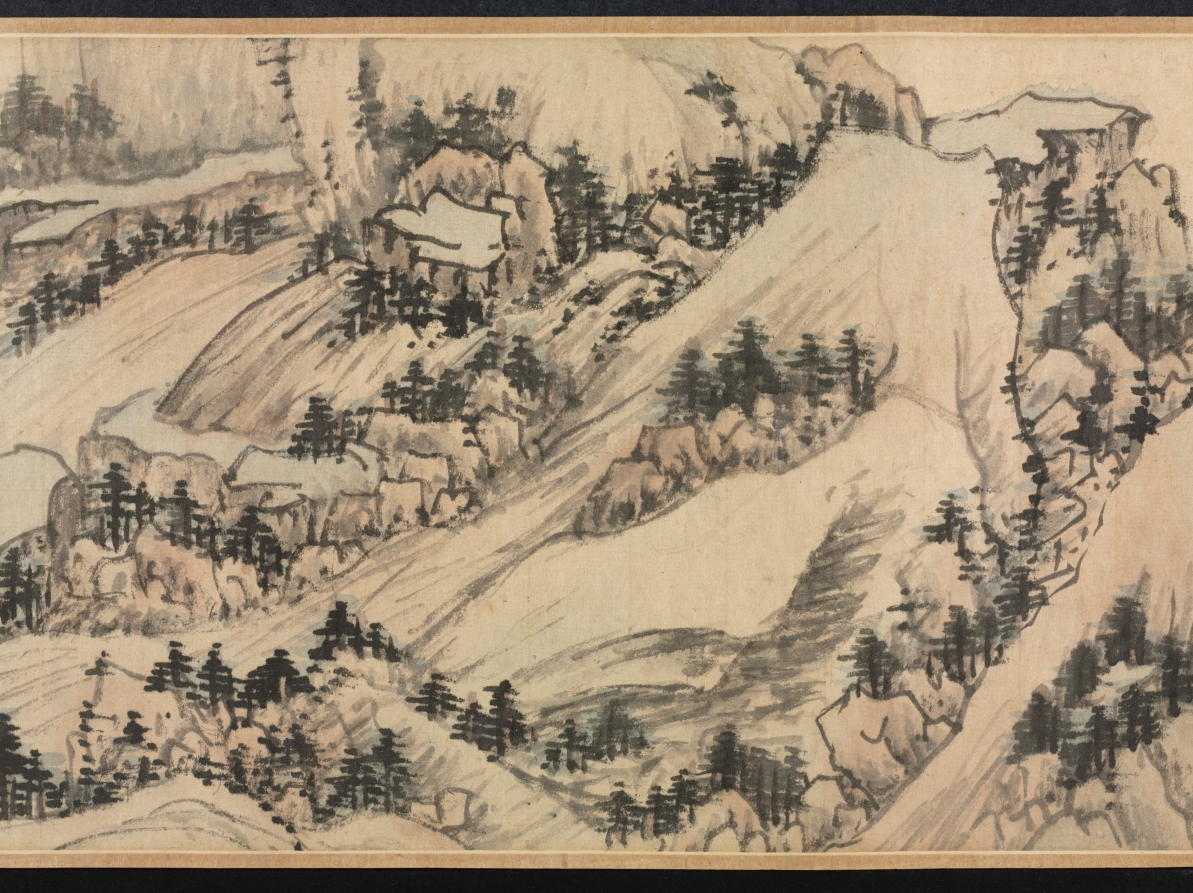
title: Dream Journey among Rivers and Mountains, no. 90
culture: China, Qing dynasty (1644-1911)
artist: Cheng Zhengkui (Chinese, 1604–1676)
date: 1658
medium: Handscroll; ink and color on paper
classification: Painting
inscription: 江山臥遊圖其九十, 青溪道人, 戊戌夏五。 [印] 程正揆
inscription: Title and inscription by Huang Yi 黃易 (1744–1802), and 3 seals.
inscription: 1 colophon and 9 additional seals: 3 seals of Dai Zhi 戴植 (active about 1821–1850); 1 colophon, dated 1914, and 3 seals of Yan Shiqing 顏世清 (1873–1929); 3 seals of Wang Nanping 王南屏 (1924–1985).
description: Cliffs and waterfalls interspersed with trees and dotted vegetation are spread over this handscroll. Long paths wind their way through villages, beside cottages, shrines, and over bridges. In the past, Chinese literati officials liked to take a “dream journey” along mountains and rivers when viewing landscape paintings in their studios. Scenery of this kind thus became a way to escape from the world of bureaucracy and administration. The painter Cheng Zhengkui used the title “Dream Journey” for a whole series of paintings, of which this is number 90. He is said to have painted 500 of them, but the actual count remains unknown.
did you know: Cheng Zhengkui planned to make 100 dream journey paintings but may have ultimately made 500.